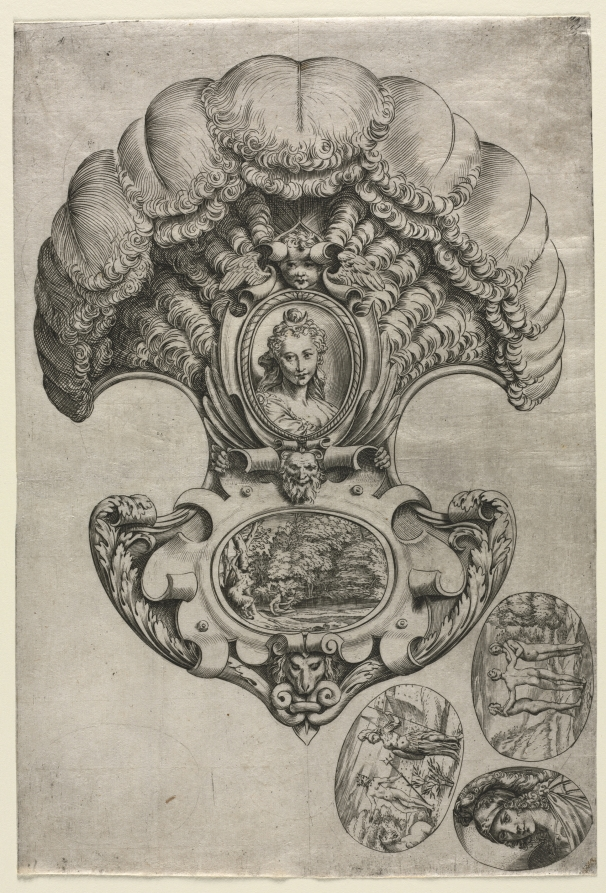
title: The Fan (L'Eventail)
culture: Italy, 16th century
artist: Agostino Carracci (Italian, 1557–1602)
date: c. 1589–95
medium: etching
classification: Print